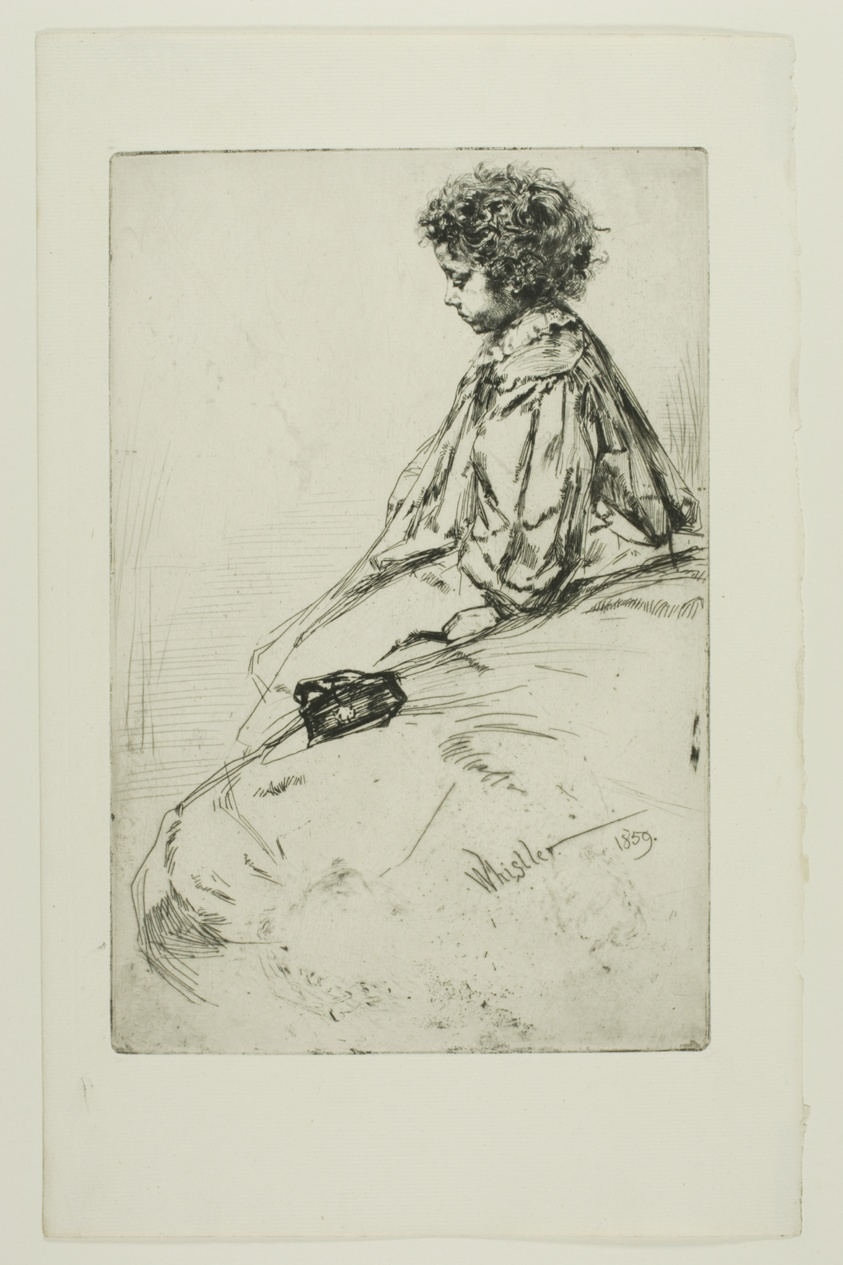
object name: Print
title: Bibi Lalouette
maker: James McNeill Whistler (American, 1834-1903)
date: 1859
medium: Etching and drypoint with foul biting in black ink on cream laid paper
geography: United States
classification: etching; foul biting; drypoint; print; prints and drawing; paper